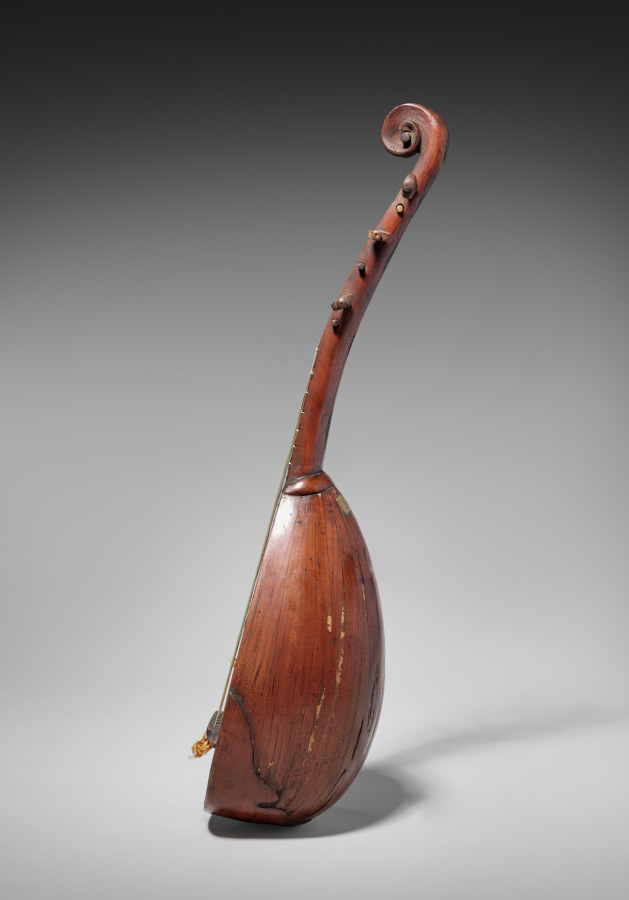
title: Pandurina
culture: Italy, 15th century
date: 1400s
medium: varnished wood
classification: Musical Instrument